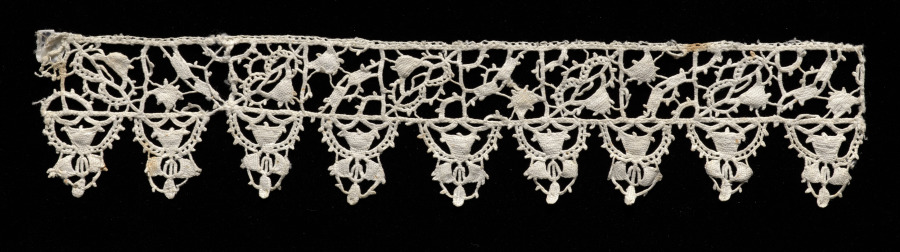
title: Lace Fragment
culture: Italy, Venice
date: 1500s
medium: Needle lace (Punto in aria) insertion and edging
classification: Lace